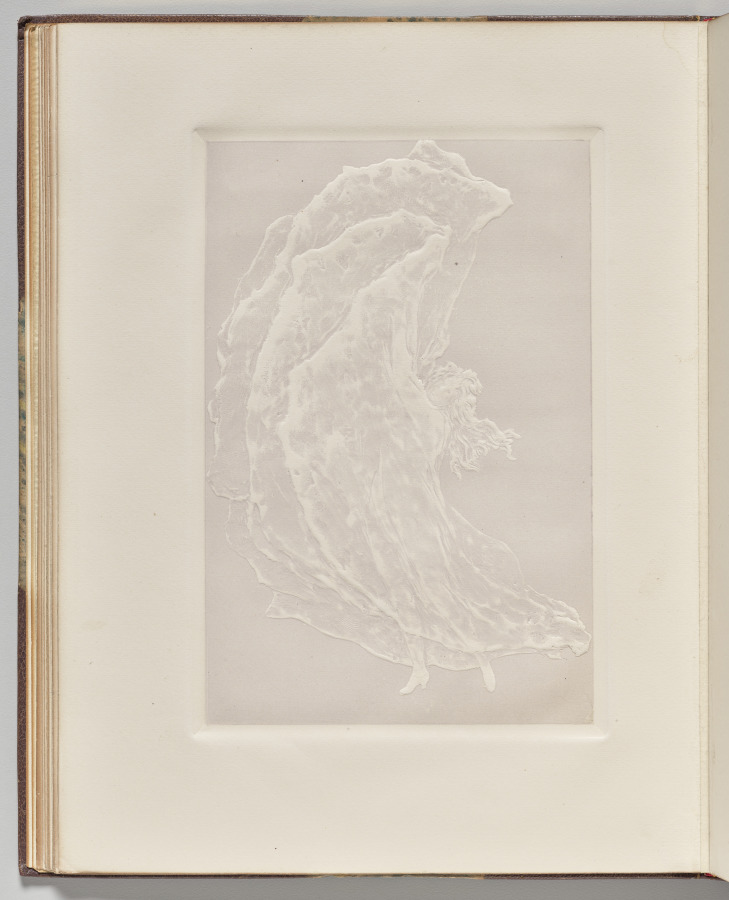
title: Dancing Woman with Arms Raised up in a Sweep of Drapery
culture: France, early 20th Century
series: La Loïe Fuller, by Roger Marx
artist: Pierre Roche (French, 1855–1922)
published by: Les Cents Bibliophiles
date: 1904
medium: gypsograph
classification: Bound Volume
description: Although best known as a sculptor, Roche was a versatile and prolific artist who worked in many mediums. Loïe Fuller, the pioneer of modern dance who took Paris by storm in 1892, was one of his favorite subjects. He portrayed her in clay, bronze, marble, plaster, and in a series of gypsographs that illustrated an essay by the art critic Roger Marx. The book was described as "a precious monument to Loïe Fuller."